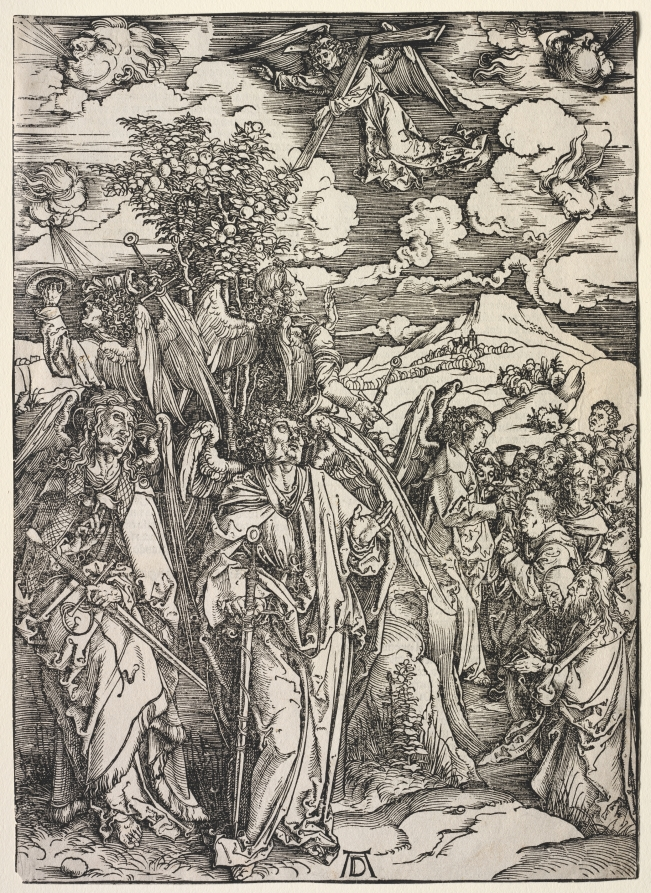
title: Revelation of St. John: Four Angels Holding up the Winds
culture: Germany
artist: Albrecht Dürer (German, 1471–1528)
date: 1511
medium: woodcut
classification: Print